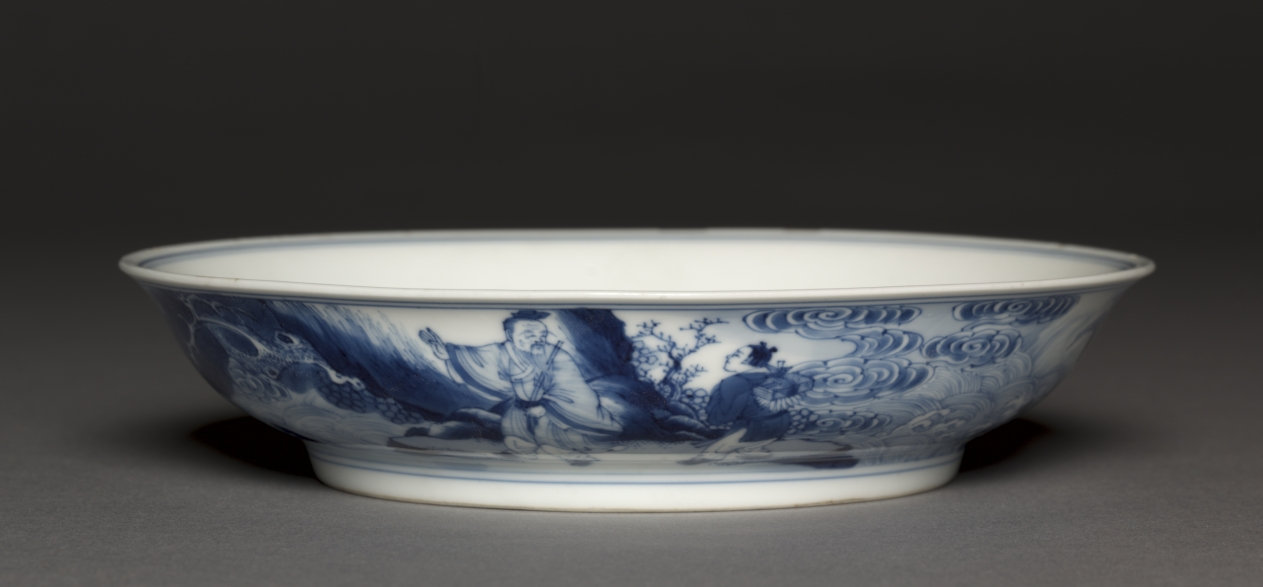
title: Dish with Laozi Riding a Water Buffalo (interior); Pavilion and Immortals in Rocky Landscape (exterior)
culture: China, Jiangxi province, Jingdezhen kilns, Qing dynasty (1644-1911), Yongzheng reign (1723-35)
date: 1723–35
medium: porcelain with underglaze blue decoration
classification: Ceramic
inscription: 大明成化年製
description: Daoism traces its origins to Laozi, a sage believed to have lived in the sixth century BC, who was the reputed author of the Daode jing (Classic of the Way), a fundamental text for Daoism. The interior of this dish depicts the elderly Laozi riding a buffalo. He is accompanied by three servants and is greeted by a scholarlike figure. This dish borrows brush and shading techniques typically employed by artists who paint on paper or silk, a development frequently seen in porcelain decoration around the 1700s.